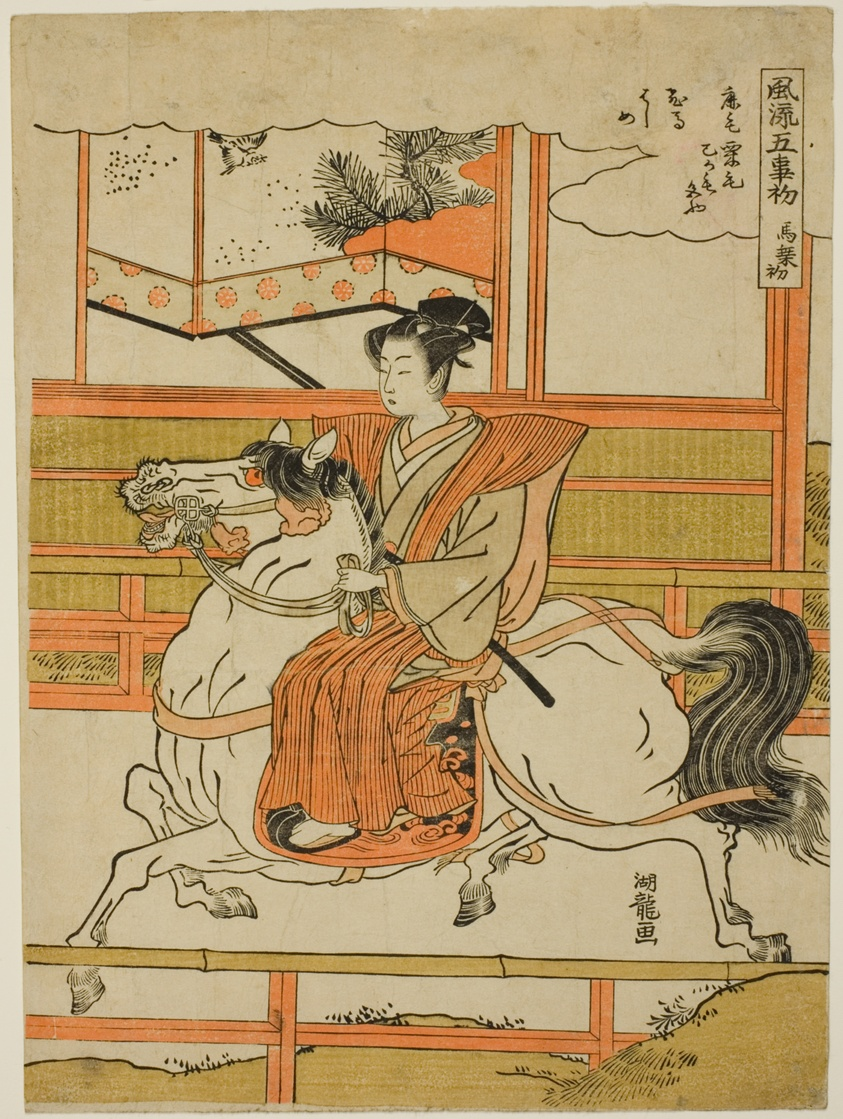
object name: Print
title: The First Horseback Ride (Uma norizome), from the series "The Five Fashionable Days of Starting (Furyu go kotohajime)"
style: Japanese (culture or style)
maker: Isoda Koryusai (Japanese, 1735-1790)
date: c. 1773/75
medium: Color woodblock print; chuban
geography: Japan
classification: woodblock print; print; asian art